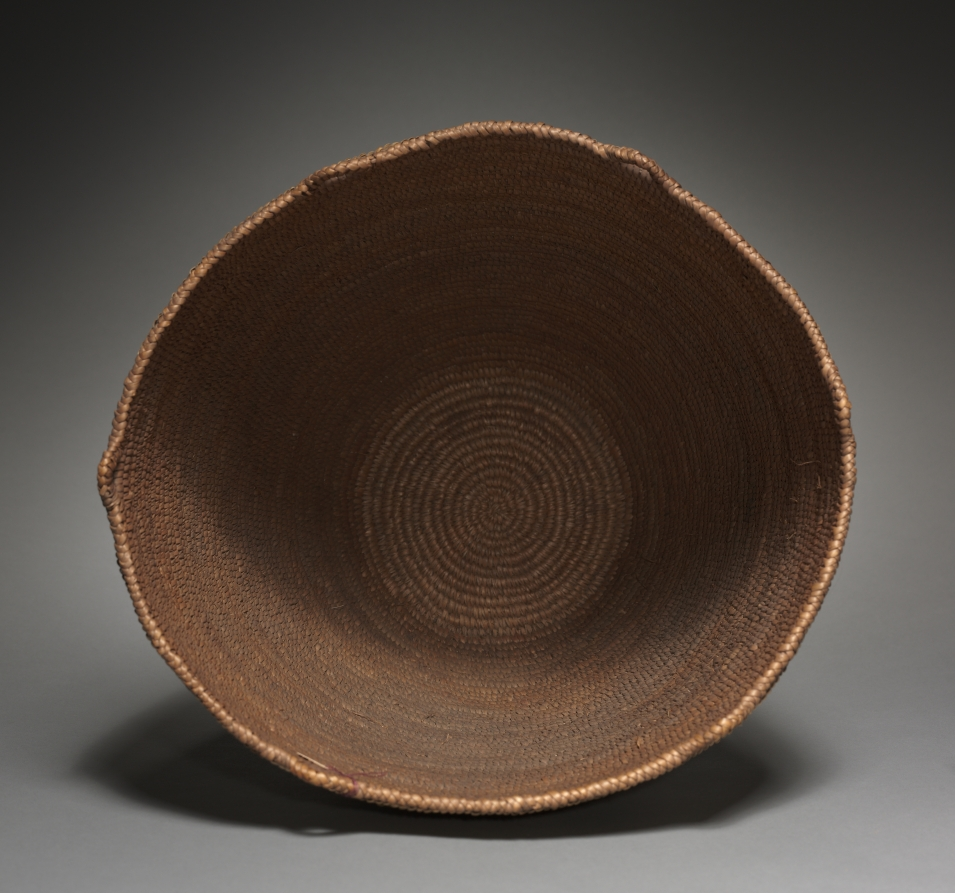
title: Burden Basket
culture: Native North American, Pacific Northwest, Plateau, Klickitat people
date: c.1900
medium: horsetail fragments on cedar rool; coiled, imbricated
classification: Basketry